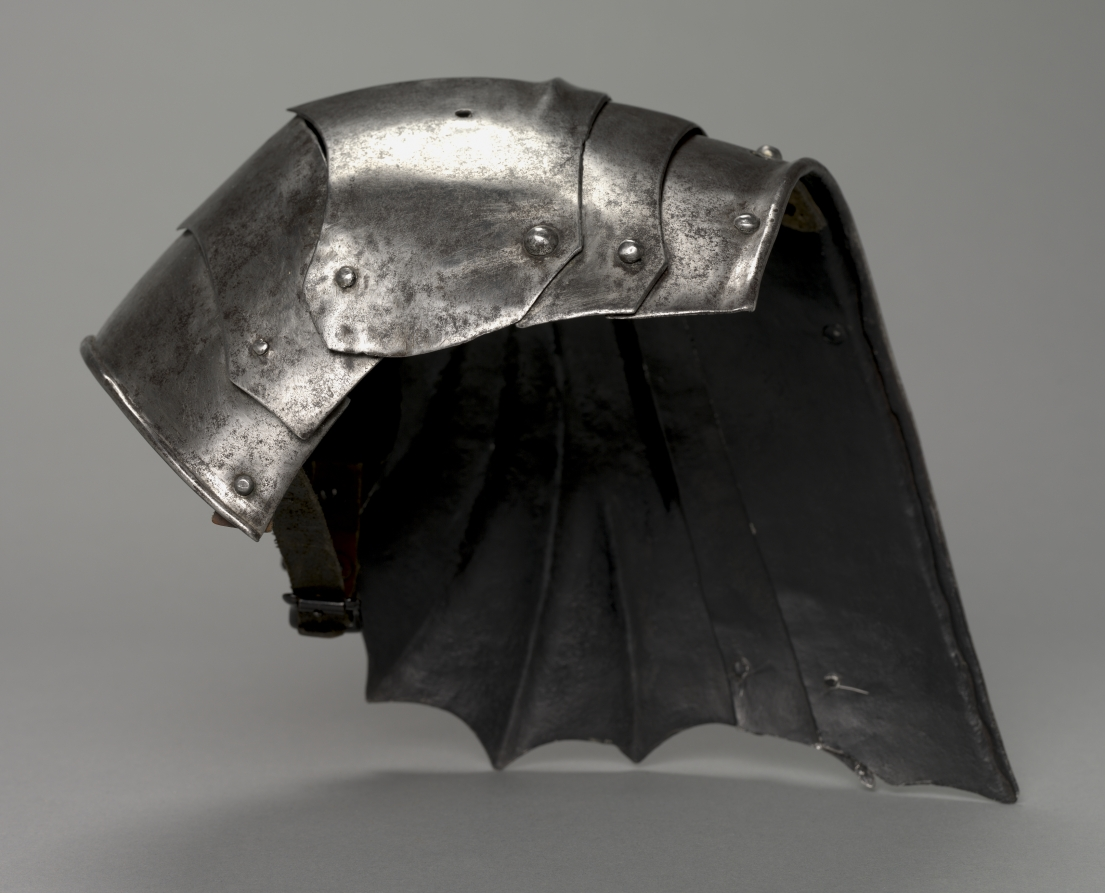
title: Gothic Fan-Shaped Pauldron (right)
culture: Italy, Milan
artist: Antonio Missaglia (Italian, 1416/17–1495/96)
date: c. 1485–1500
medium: steel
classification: Arms and Armor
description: When the elements that made up a suit of armor had been forged, shaped, and polished, they were inspected for fit and finish. At this stage the master armorer would use a punch to stamp each element with his maker's mark. Other associated marks might include a town or guild mark, depending on the city of origin. The set of three marks shown here are of a type known to be Milanese. The upper mark seems to show three letters beneath a crown, while the mark below, twice repeated, is a split cross with the letters inside. These probably refer to the Missaglias.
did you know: A pauldron is a component of plate armor that covers the shoulder and often the armpit, and parts of the back and chest as well.